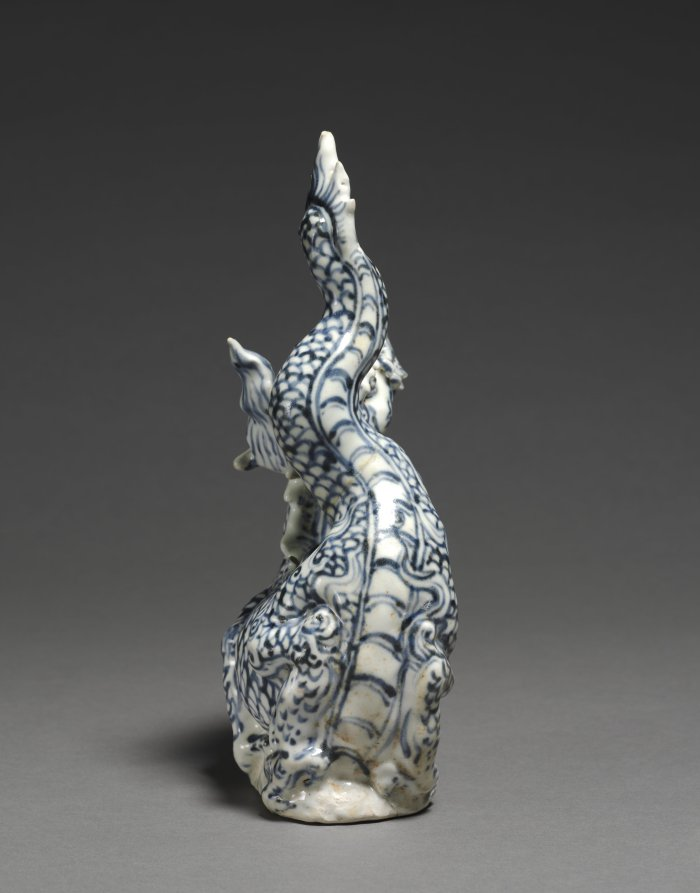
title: Ewer in the Shape of a Dragon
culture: Vietnam (Annam)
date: 1400s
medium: porcelain with underglaze blue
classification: Ceramic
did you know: This dragon-shaped vessel was tilled through a hole in the tail and emptied through the dragon's mouth.